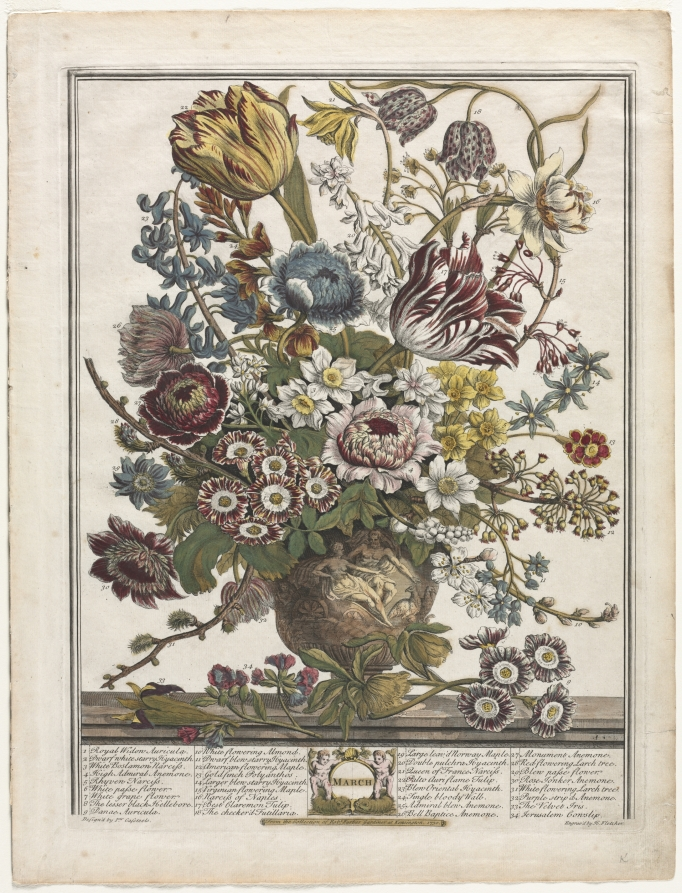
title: Twelve Months of Flowers: March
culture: England, 18th century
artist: Henry Fletcher (British, active 1715–38)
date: 1730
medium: engraving, hand-colored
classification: Print